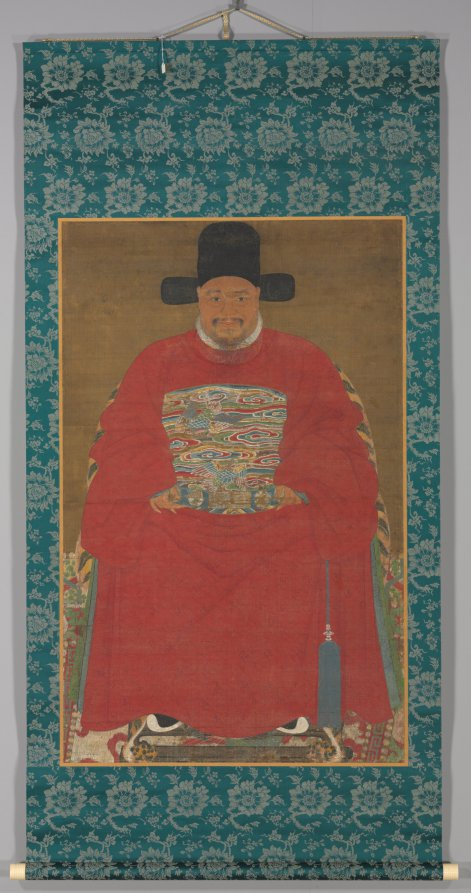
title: Portrait of an Official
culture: China, Ming dynasty (1368-1644) - Qing dynasty (1644-1911)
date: 1600s–1700s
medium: hanging scroll; ink and color on silk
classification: Painting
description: This official's portrait was done in the portrait painting style of the Ming dynasty.